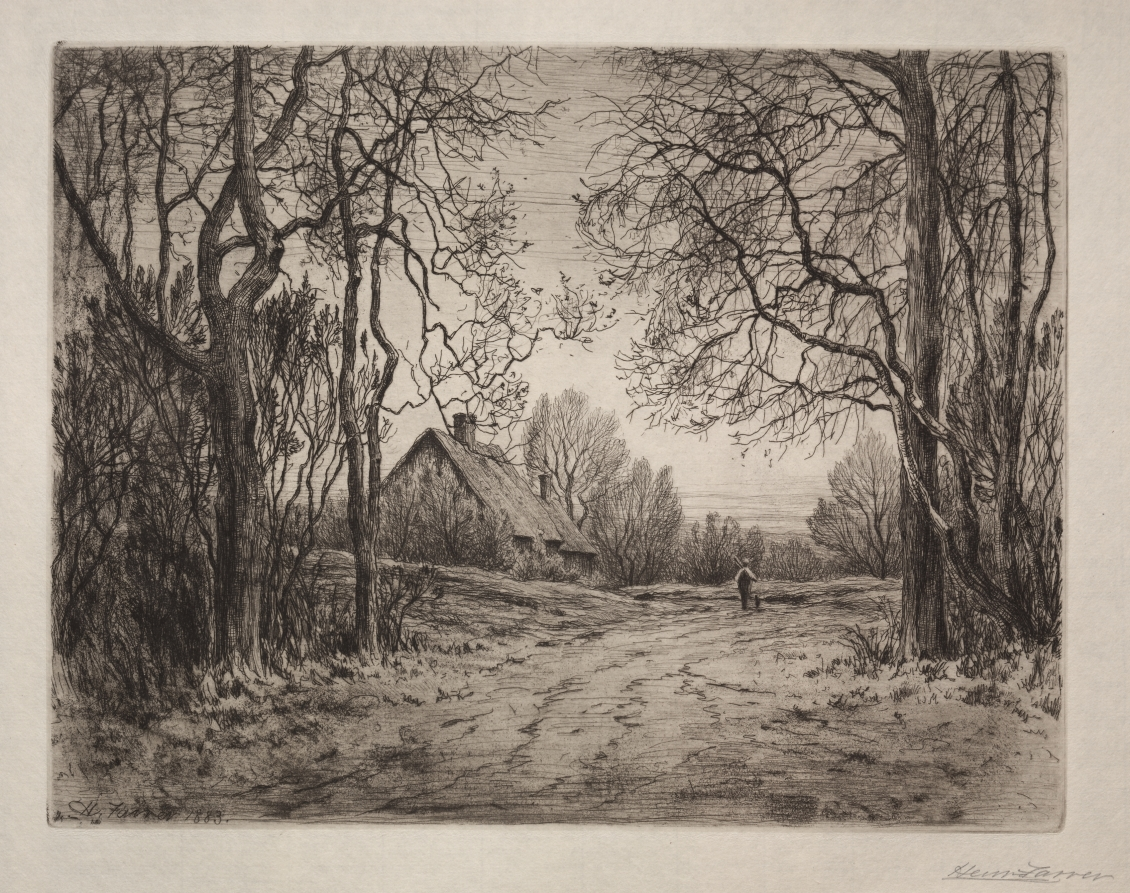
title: Winter Evening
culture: America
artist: Henry Farrer (American, 1843–1903)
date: 1883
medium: etching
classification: Print